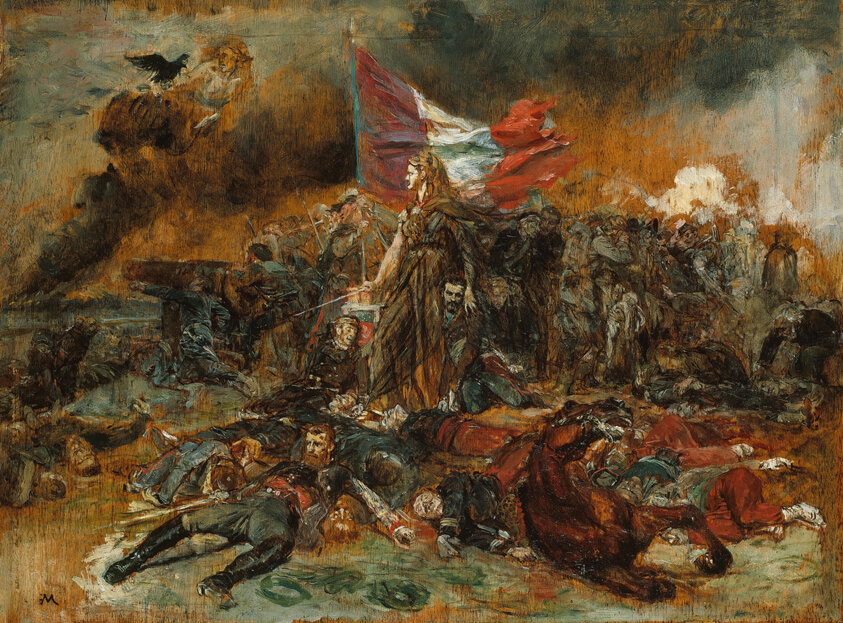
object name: Painting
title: The Defense of Paris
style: nineteenth century, 19th century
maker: Jean Louis Ernest Meissonier (French, 1815–1891)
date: 1870/71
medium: Oil on panel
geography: France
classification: oil on panel; paint; oil paintings (visual works); french; painting; european painting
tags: war, France, death, flags, horse, horses, animals, smoke, men, women, liberty, people, Paris